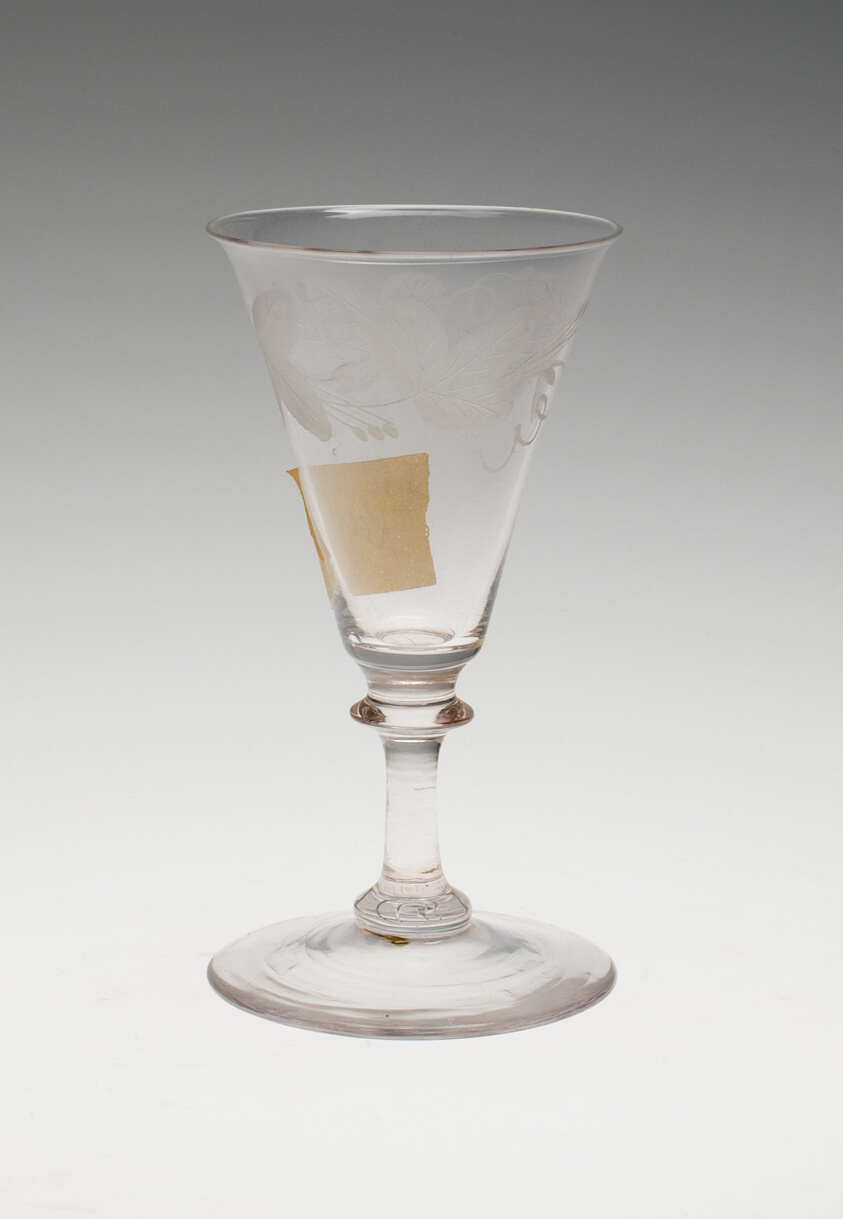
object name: Glass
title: Goblet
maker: England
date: c. 1760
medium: Glass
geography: England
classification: drinking vessel; glass; european decorative arts